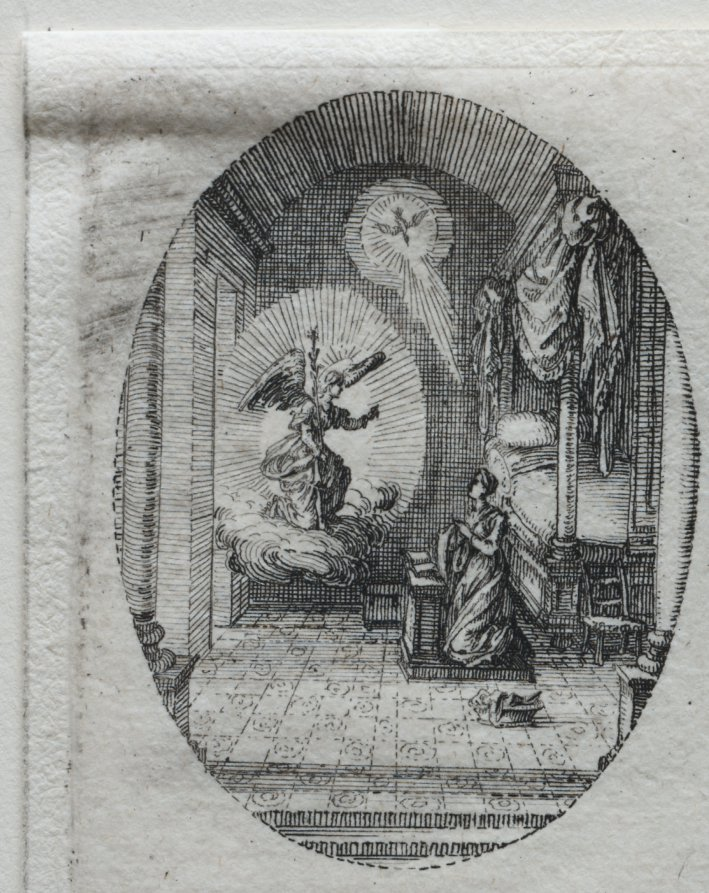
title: The Mysteries of the Passion: The Annunciation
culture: France, 17th century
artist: Jacques Callot (French, 1592–1635)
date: 1631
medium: etching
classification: Print